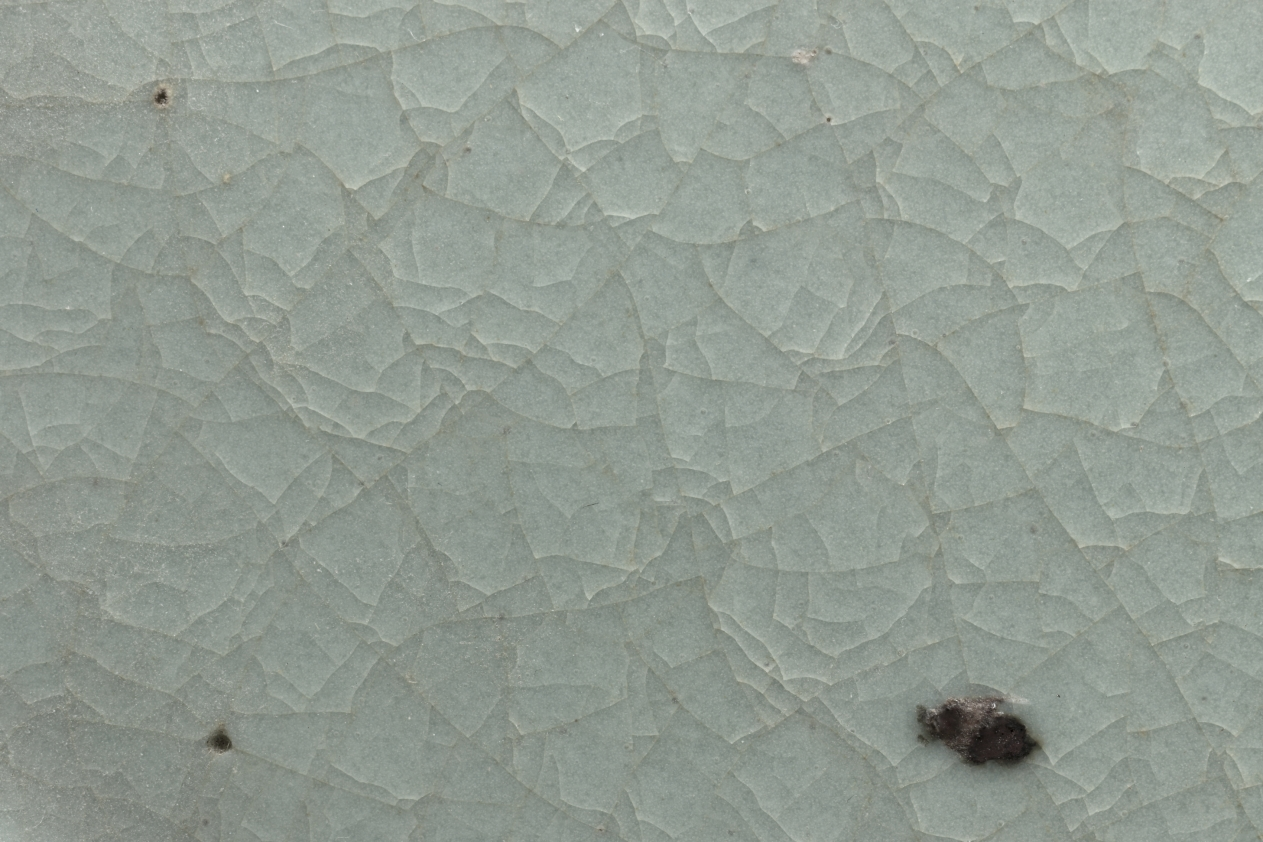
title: Brush Washer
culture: China, Henan Province, Baofeng, Qingliangsi, Northern Song dynasty (960-1127)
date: late 1000s–1127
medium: porcelaneous stoneware, Ru ware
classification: Ceramic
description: Ru ware is the rarest and most celebrated of all Chinese imperial wares. It was made for the late Northern Song court for a very short time and was therefore extremely rare and precious. Simplicity and refined elegance are Ru ware's hallmarks. Its graceful shape, soft luster, and subtle color variation of the glaze interact in perfect unity. Other physical characteristics include an ash-grey body, soft greyblue glaze with a fine crackle, as well as small sesame-seed spur marks on the base.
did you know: The little black spot in the glaze inside the dish is one of the slight imperfections characteristic of genuine Ru ware.